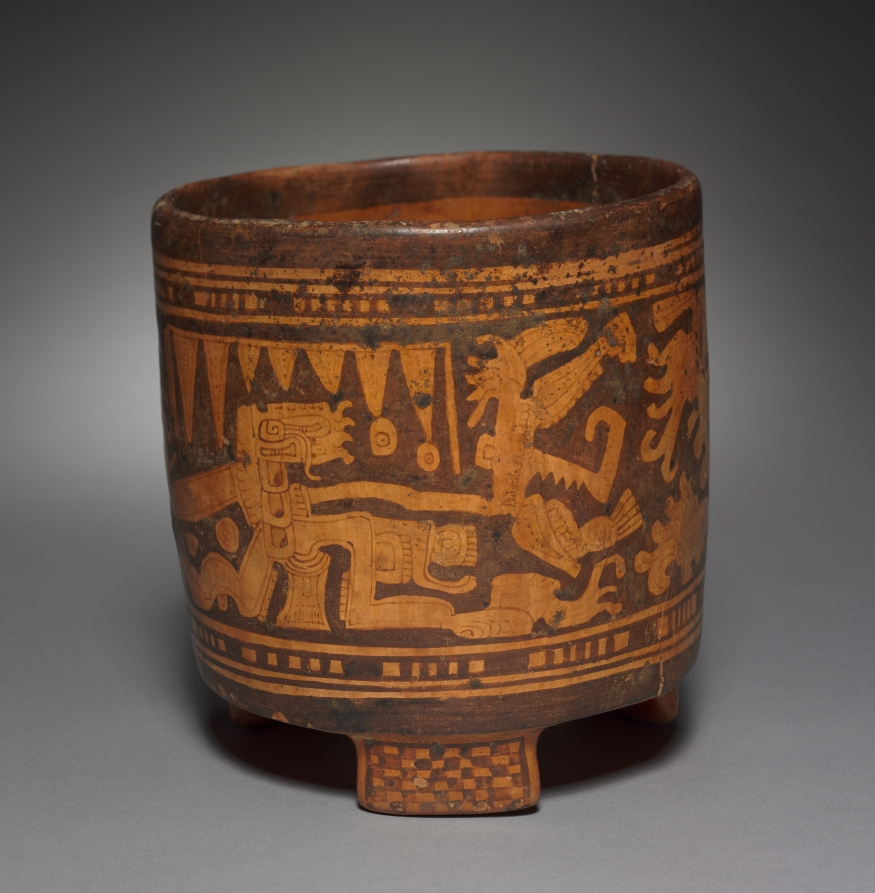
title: Vase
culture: Honduras, Maya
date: 250–900 CE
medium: earthenware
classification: Ceramic